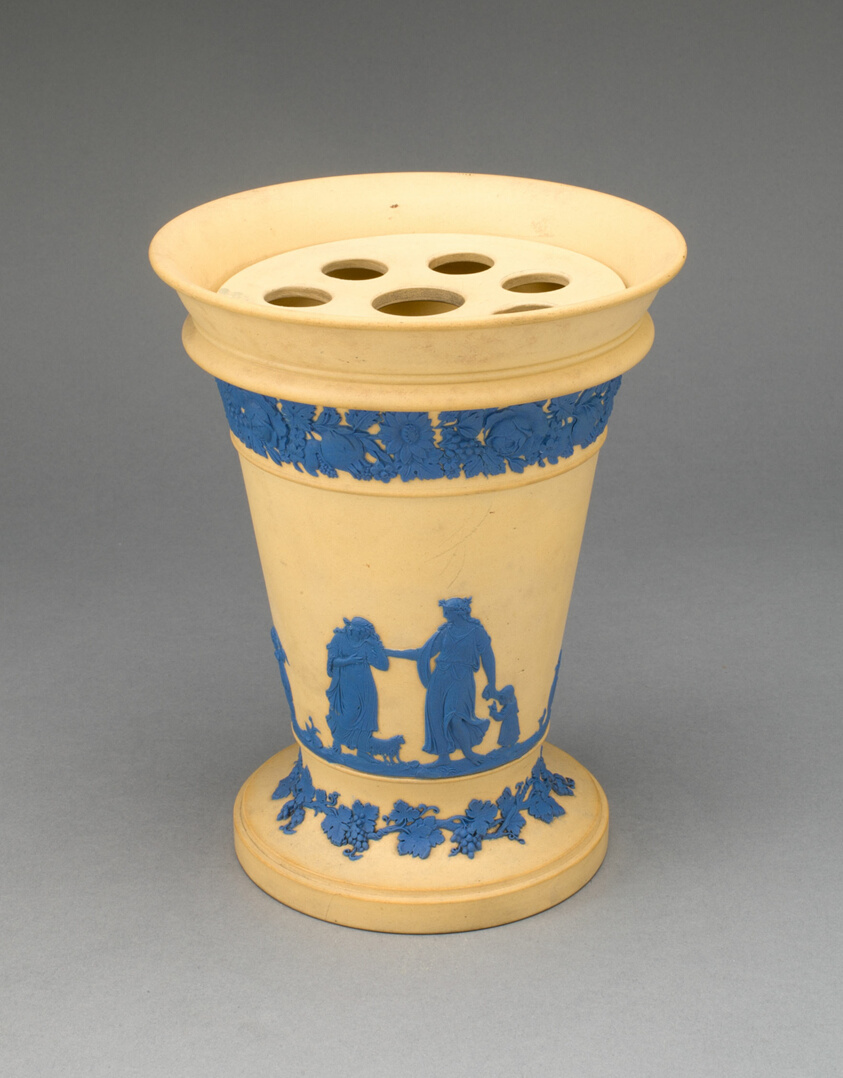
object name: Ceramics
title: Vase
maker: Wedgwood Manufactory (England, founded 1759)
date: 1820/20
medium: Stoneware (caneware) with applied blue decoration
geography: Burslem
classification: vase; vessel; ornamental piece; stoneware; european decorative arts; ceramics